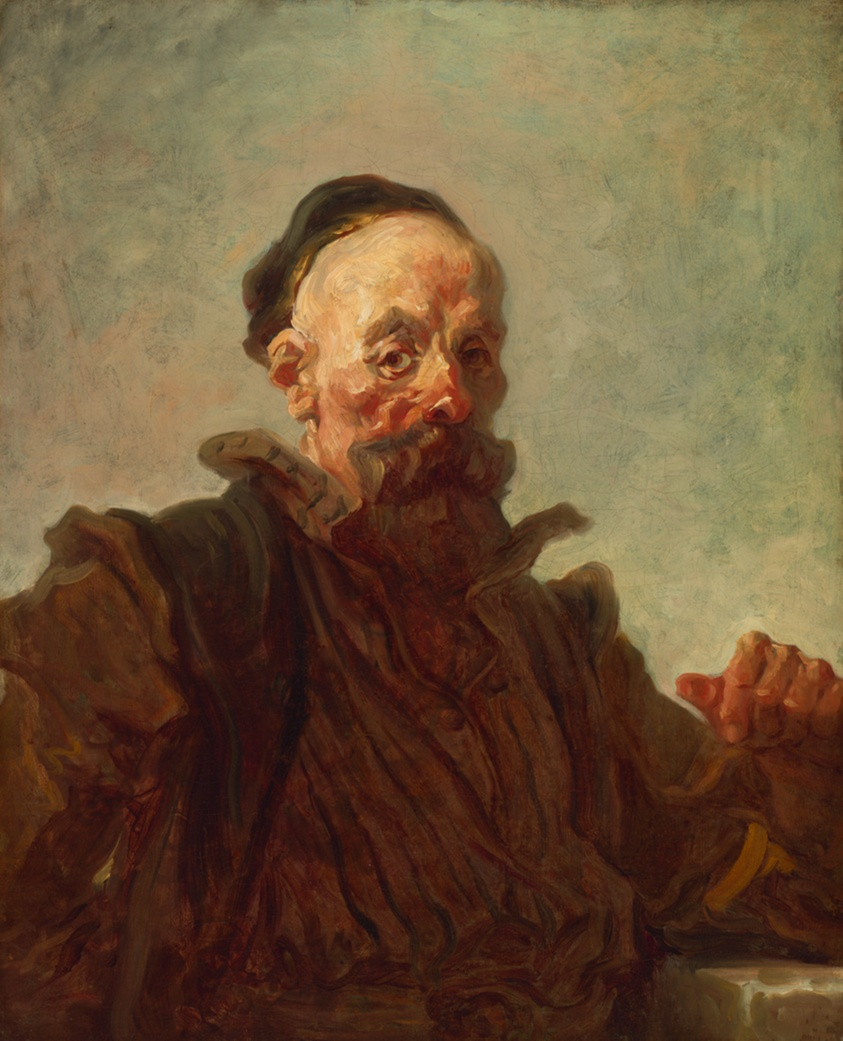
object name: Painting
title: Portrait of a Man in Costume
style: Flemish, 18th Century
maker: Jean-Honoré Fragonard (French, 1732–1806)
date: c. 1767–68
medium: Oil on canvas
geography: France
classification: oil on canvas; france; french; oil paintings (visual works); paint; portrait; painting; european painting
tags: portraits, France, French, hat, man, beards, costumes, men